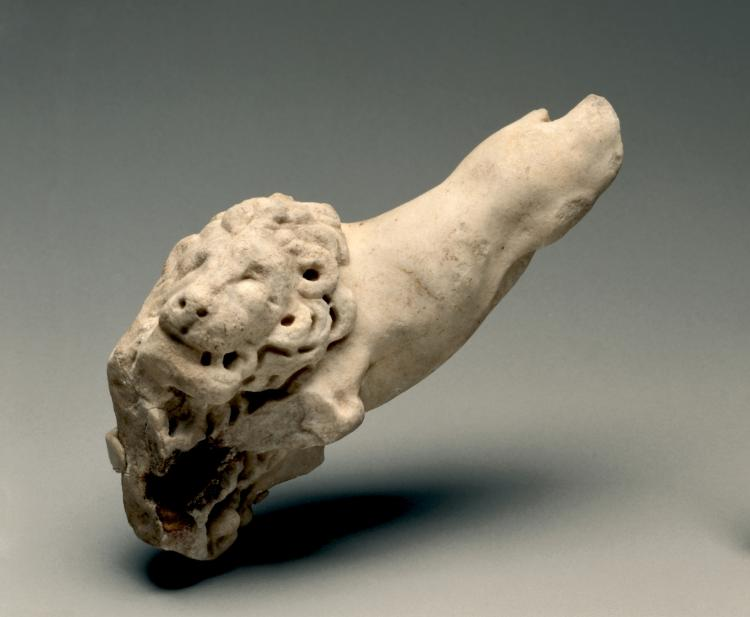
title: Fragment of a Lion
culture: Italy, Roman(?)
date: before 1915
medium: marble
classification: Sculpture